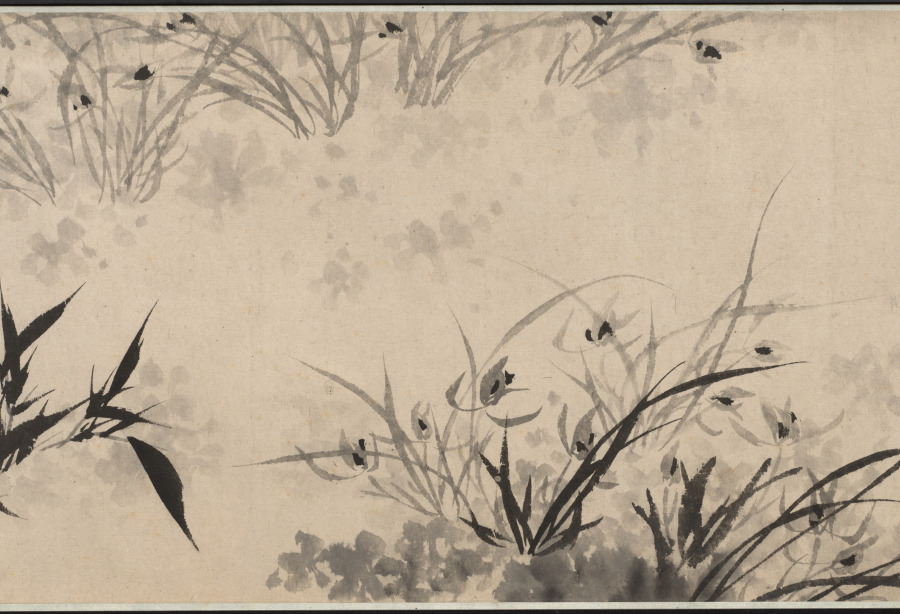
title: Rocks, Orchid, and Bamboo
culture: China, Qing dynasty (1644-1911)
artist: Shitao (Chinese, 1642–1707)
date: 1662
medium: handscroll; ink on paper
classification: Painting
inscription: Title colophon in four characters with signature and two seals on gold-flecked paper.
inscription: Artist's signature, inscription (with date of 1662), five seals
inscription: Colophon with two seals.